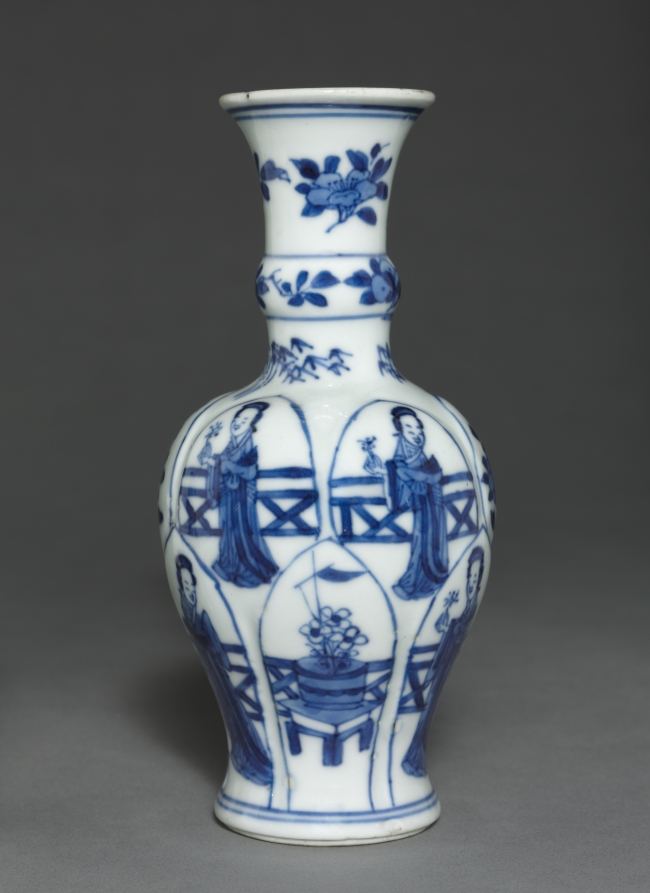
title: Vase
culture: China, Qing dynasty (1644-1911)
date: 19th Century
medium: porcelain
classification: Ceramic